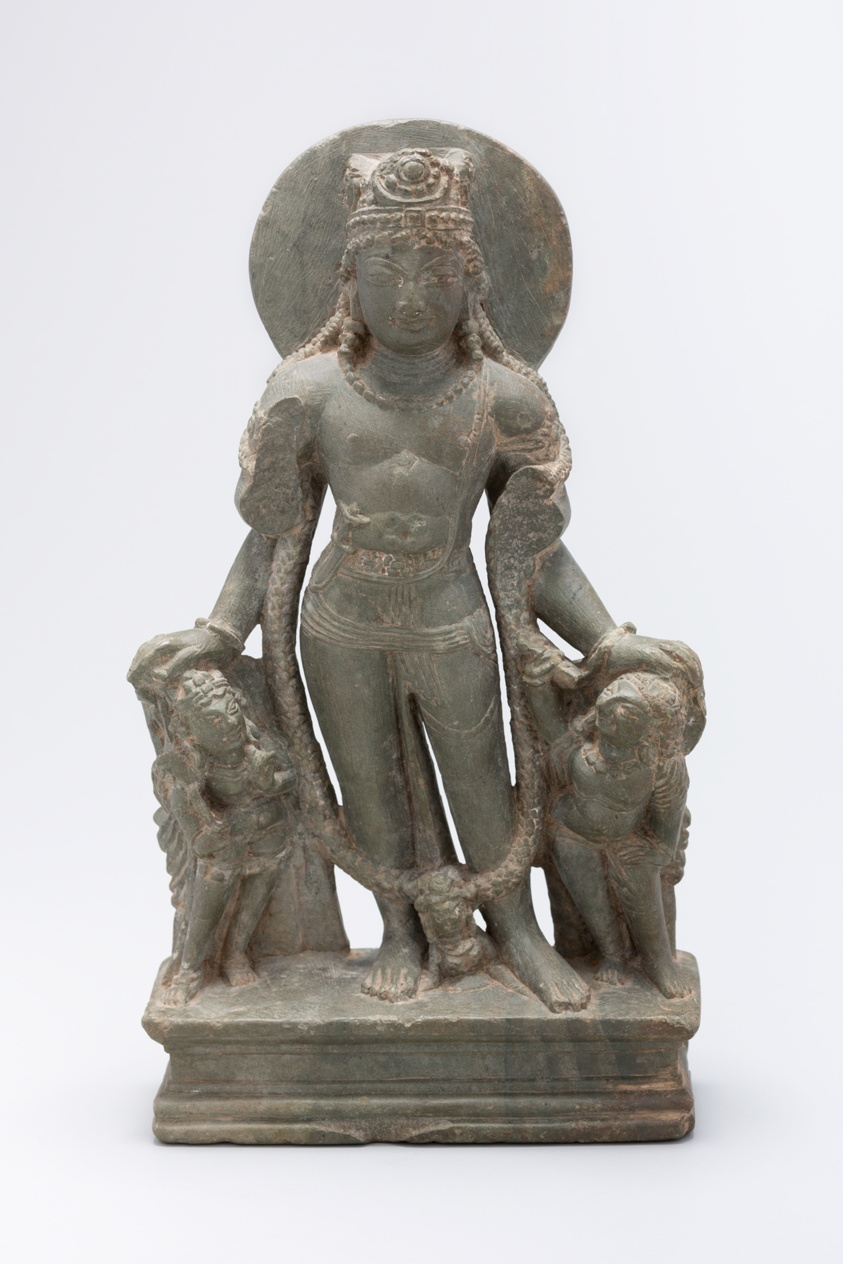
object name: Sculpture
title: Four-Armed Standing God Vishnu with Personified Weapons (Ayudhapurusha)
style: South Asian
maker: India; Kashmir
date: 8th/9th century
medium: Green chlorite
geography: Kashmir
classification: schist; stone; sculpture; asian art